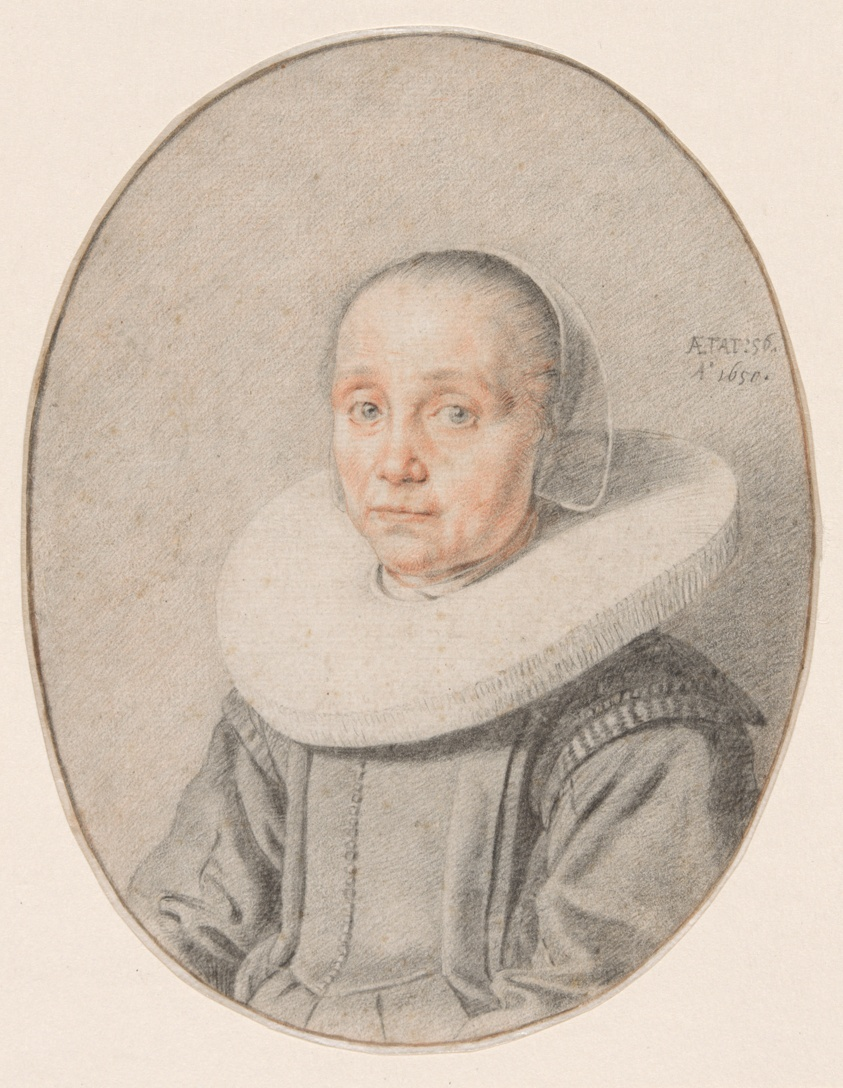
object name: Drawing and Watercolor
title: A Portrait of a Woman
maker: Jan de Bray (Dutch, c. 1627-1697)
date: 1650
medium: Black and red chalk on ivory laid paper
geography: Netherlands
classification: drawings (visual works); prints and drawing